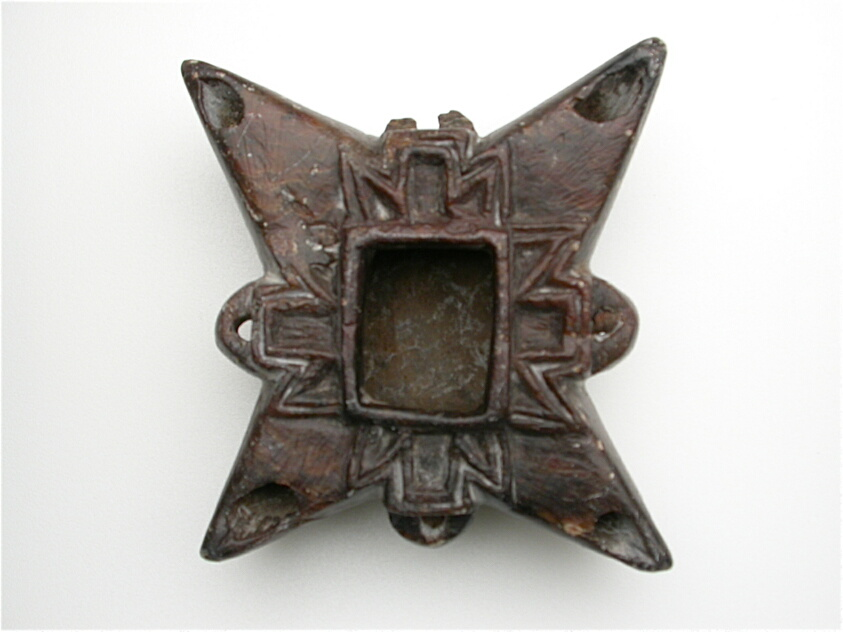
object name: Decorative Arts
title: Lamp in Form of Four-Pointed Star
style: coptic (period)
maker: Egyptian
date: Coptic Period (4th–7th century)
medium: Steatite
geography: Egypt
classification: lamp (lighting device); stone; vessel; ancient art; decorative arts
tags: star, writing, inscription